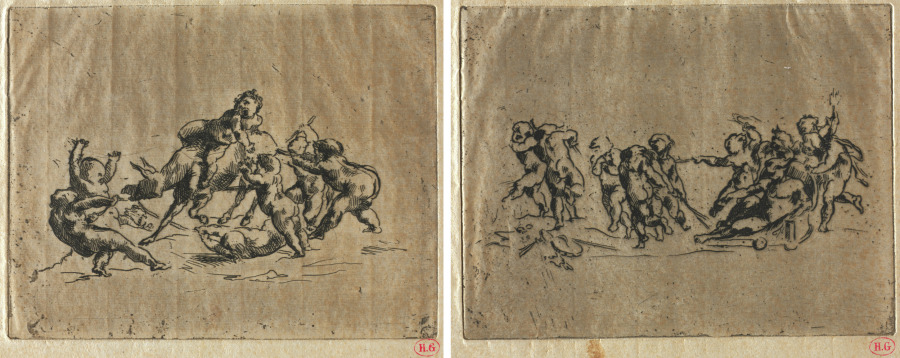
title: Bacchanal with Children and Donkey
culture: France, 19th century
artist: Jean-Baptiste Carpeaux (French, 1827–1875)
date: c. 1860–70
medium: etching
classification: Print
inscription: below the lower right platemark edge: stamp for Hector Giacomelli (Lugt 1311)